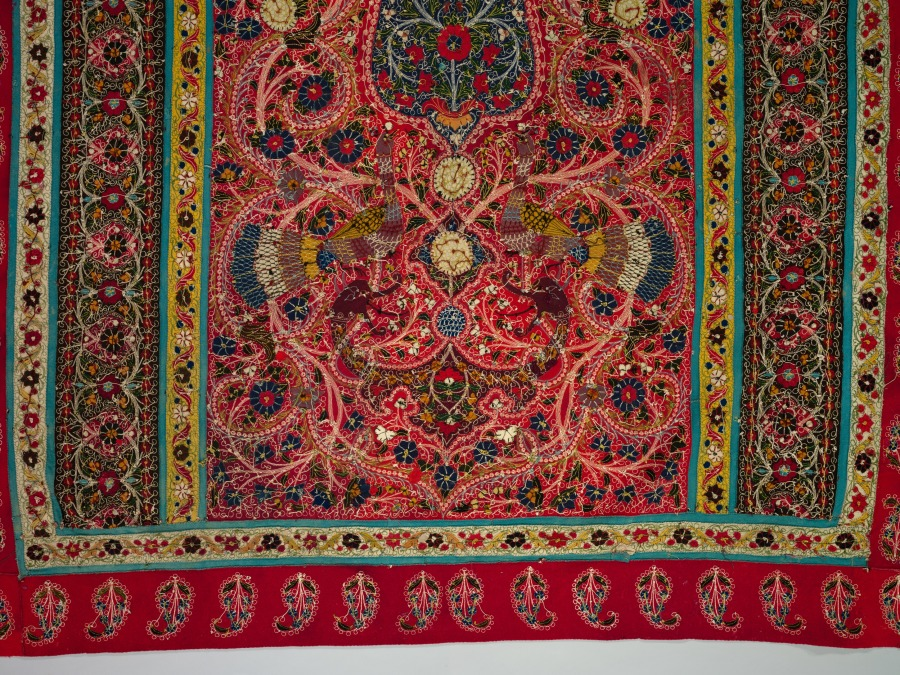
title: Tent Wall Panel(?)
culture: Iran, Rasht, Qajar period (1779-1925)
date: 1800s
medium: Wool: inlaid work; silk: embroidery, chain stitch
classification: Embroidery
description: Elaborate arched panels with multiple borders similar to this textile formed the mosaic-like interior walls of imperial tents. Here, the field is dominated by a richly decorated cypress tree above peacocks and dragon heads on an ornate foliate ground. We look upon the gardenscape through a niche (mihrab) formed by this foliage. Bright white silk “pearl” outlines, vines, and ringlets in chain-stitch embroidery enliven the pattern on contrasting colors of fulled wool. Internationally fashionable botehs, or paisleys, decorate the outer red borders.This technique has been referred to by many different names including: Rasht work, Resht work, Rashti-duzi, Rachti-douzi, embroidery applique, mosaic embroidery, piecework, patchwork, embroidery brocade, and inlaid patchwork. Many of these terms are to various degrees inaccurate descriptions of this technique. Perhaps the most practical term is Rasht work, named for the town in Iran where the technique was popularized. It begins as a ground of felted plain weave wool. Desired shapes are then punched out of the ground with a metal die and hammer. The same is done with wool of an alternating color. The edges of the different cut pieces are then embroidered together into various designs using a silk chain stitch (golab-duzi). Although this piecework technique was recorded in Iran in the 1670s, most examples survive from the 19th century, when foreigners praised them as “really [the] most beautiful embroidery.” The technique appears in furnishing fabrics, and horse covers, as well as imperial portraits, including one depicting the Qajar monarch Fath ‘Ali Shah, who ruled in 1797–1837. Sometime after leaving the workshop this panel experienced moth damage; small patches can be seen throughout.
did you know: Generally, Rasht work was made by men. Boys handled the delicate embroidering while older men designed cartoons and punched the wool designs.